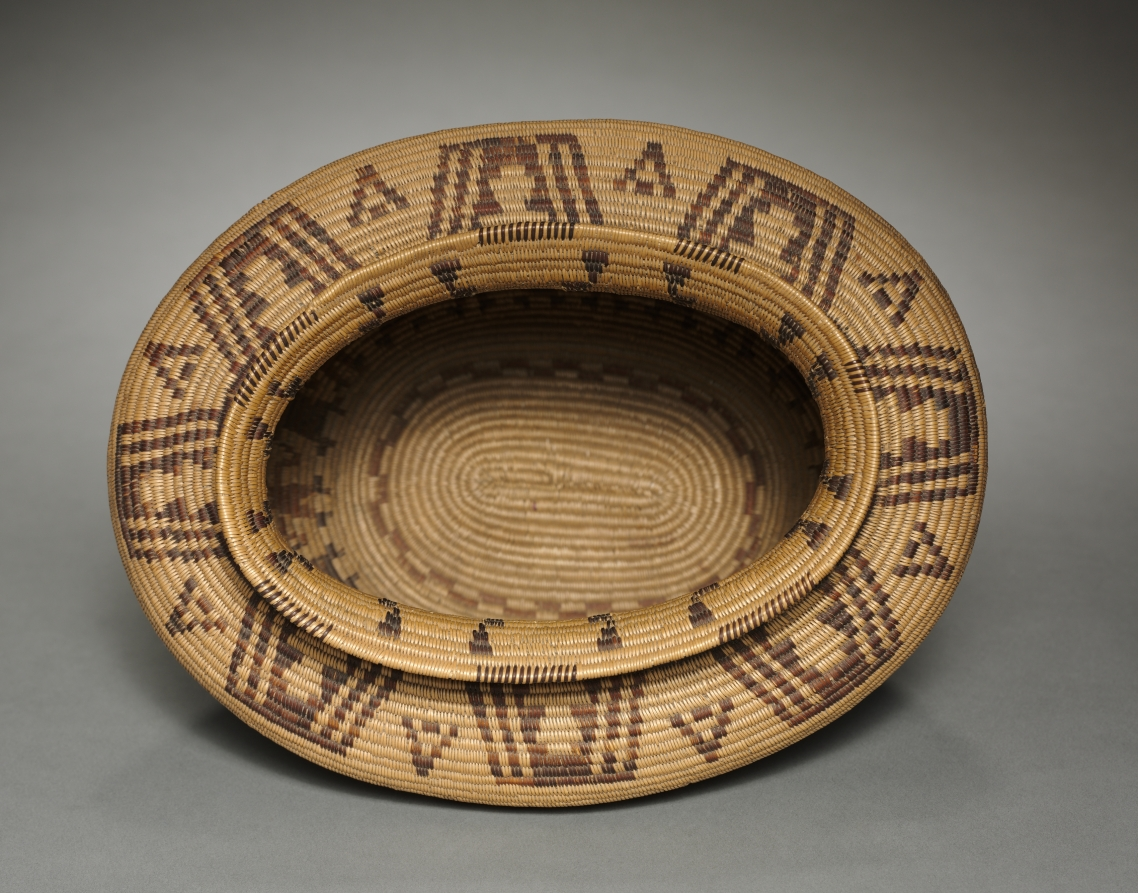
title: Jar-shaped Basket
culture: Native North America, Great Basin, California, Death Valley, Timbisha (Panamint) Shoshone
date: c. 1900–1910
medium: willow, bulrush, yucca root; coiled (3 rods)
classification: Basketry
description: The figures woven in the lower register of this basket were borrowed from basketry of the Yokuts, a California group that lived to the west of Timbisha (Panamint) Shoshone territory.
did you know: The figures woven in the lower register of this basket were borrowed from basketry of the Yokuts.